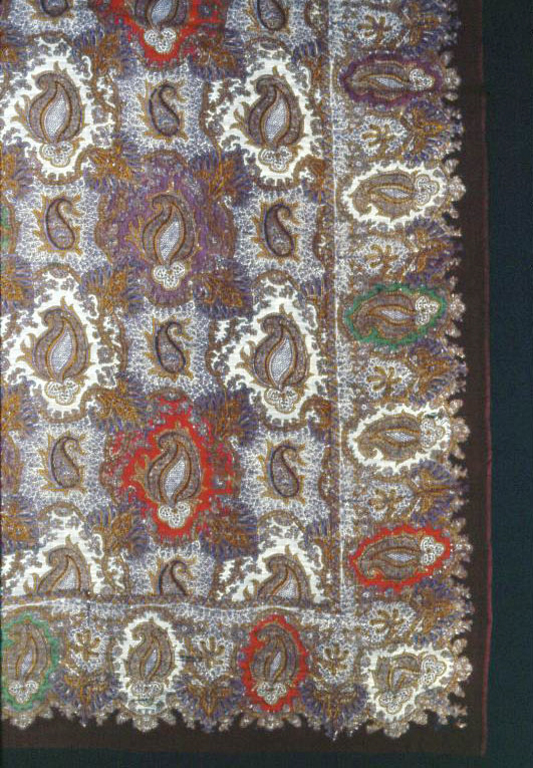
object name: Textile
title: Long Shawl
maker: Europe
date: 1850/1900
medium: Silk, plain gauze weave; block printed; weft fringe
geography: Europe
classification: textile; weaving - printed